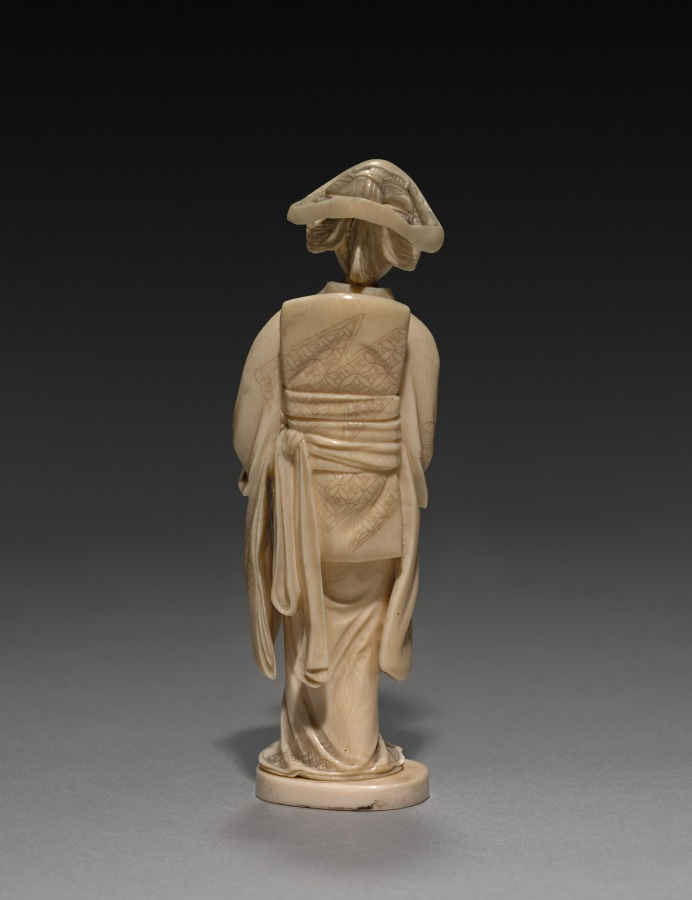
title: Woman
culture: Japan, Meiji period (1868–1912)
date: early 1900s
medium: ivory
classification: Ivory